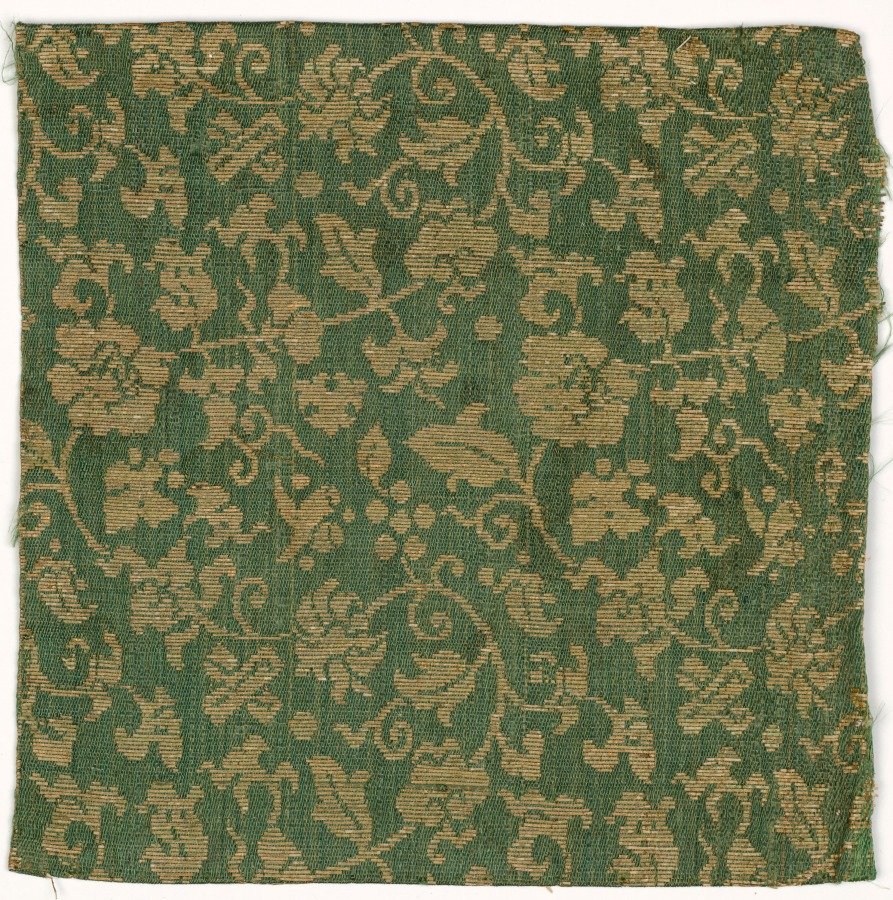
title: Textile Fragment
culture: Japan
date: 1800s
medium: silk, metallic thread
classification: Textile